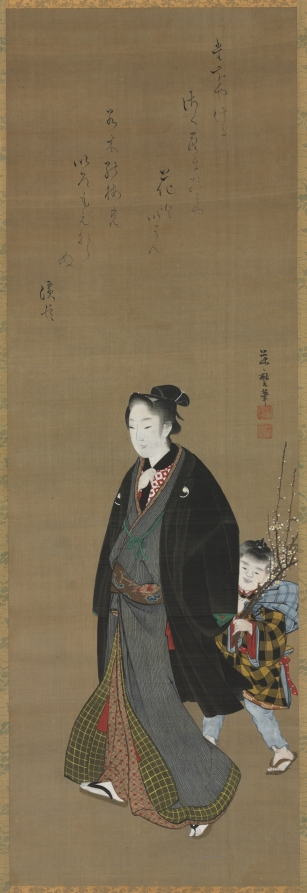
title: A Beauty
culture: Japan, Edo period (1615–1868)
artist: Fujimaro (Japanese, d. 1830)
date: c. 1810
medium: hanging scroll; ink and color on silk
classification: Painting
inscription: Artist's signature and two seals middle right side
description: Many ukiyo-e paintings and prints focus on bijin (美人), or “beautiful people.” Female courtesans and entertainers were the main draw in the pleasure district of Edo (now Tokyo), but young men were also available. The poem here reads as follows: "The full blooming cherry / is not the only flower worth mentioning. / The color of the young plum tree / blooms as well." The full blooming cherry is a metaphor for mature women, and the plum for young men.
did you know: The handsome youth in the painting is accompanied by a boy carrying a plum branch.